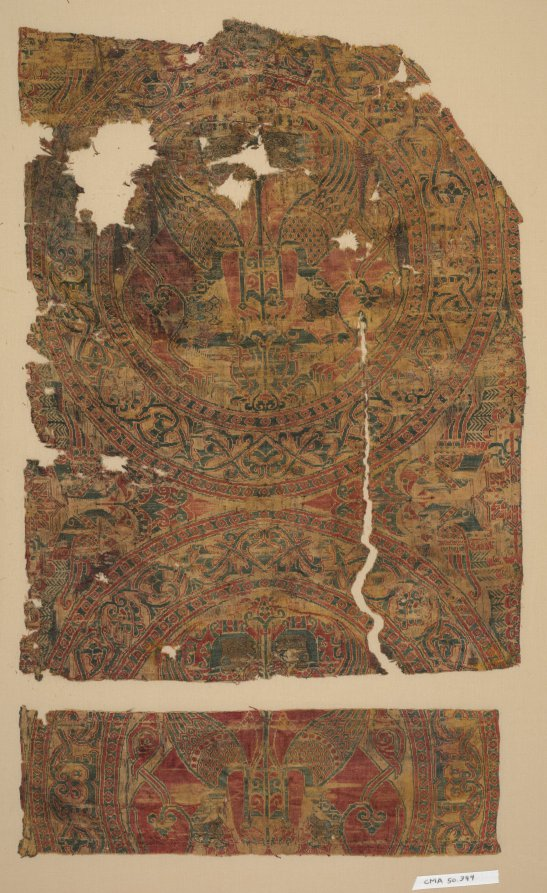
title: Fragment with confronted sphinxes in roundels from the tomb of Saint Bernard Calvo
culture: Spain, Almeria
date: 1200–43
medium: Silk and gold thread: lampas, taqueté, and plain-weave variant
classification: Textile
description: Composite creatures, such as winged lions and sphinxes, predate the rise of Islam in the Arabian Peninsula. Islamic textiles continued to include them for centuries after the Arab conquest of Spain. Pairs of lions with gold faces rear up to bite the haunches of the winged beasts. In between the roundels are pairs of peacocks, motifs traceable to pre-Islamic Persian art that spread throughout the Islamic world, including Spain. The body of Saint Bernard Calvo, the Catholic Bishop of Vich in 1233–43, was wrapped in textiles, including these fragments that still retain traces of his blood.